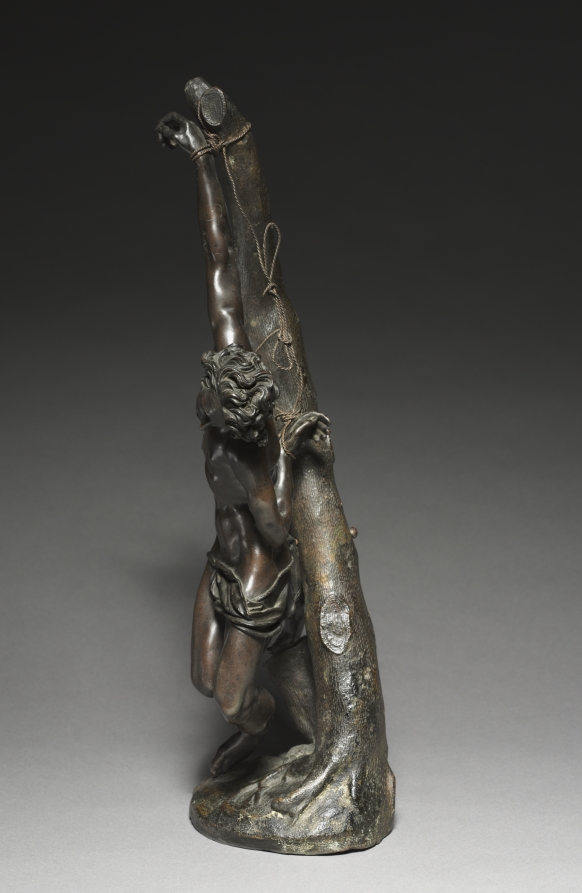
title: Saint Sebastian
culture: Germany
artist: cast after a model probably by Georg Petel (German, c. 1601-c. 1634)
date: 1620s or later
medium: bronze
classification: Sculpture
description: This composition is the subject of an ongoing attribution debate. The design is adapted from a painting by Adam Elsheimer, a German artist working Rome. This sculptural model exists in many versions; however, they vary considerably in their execution, complicating the identification, because they were clearly not made by a single sculptor or workshop. However, Georg Petel probably first created the design as he traveled across Italy in 1620–24, where his portrait was painted holding this composition.